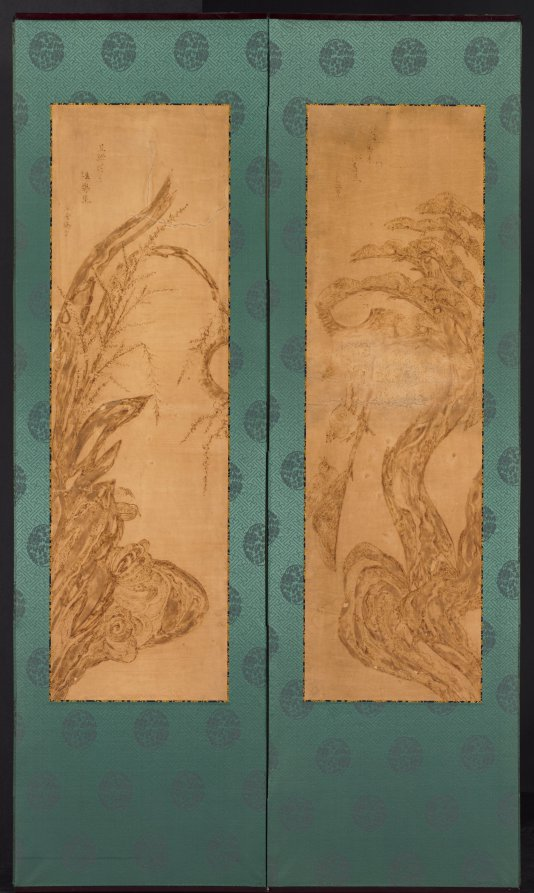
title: Birds and Flowers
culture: Korea, Joseon dynasty (1392–1910)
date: late 1800s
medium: Ten-panel folding screen with designs and inscriptions burnt into paper (pyrography)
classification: Painting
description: The image depicted on this folding screen is not executed in ink, but rather a method called “pyrography" or "nakhwa,” a technique of burning the surface of materials ranging from wood to paper with the delicately controlled application of a heated metal tool. This technique became widely popular in the 19th century. Scorched marks here replace brush strokes. Nakhwa method is now designated as a Korean Intangible Cultural Asset by the Korean government.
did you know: The painting is done by a pyrography method, a technique of burning the surface of materials with a heated tool.